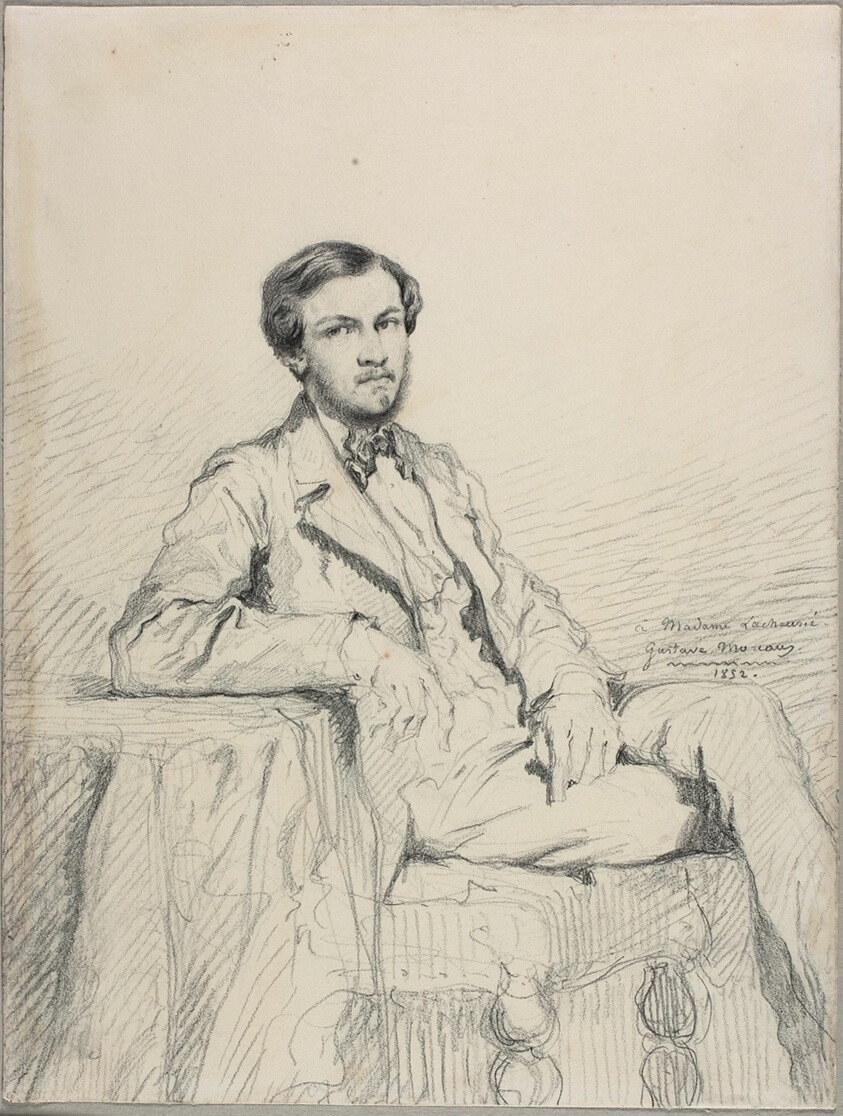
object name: Drawing and Watercolor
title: Portrait of Eugène Lacheurié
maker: Gustave Moreau (French, 1826-1898)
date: 1852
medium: Graphite on ivory wove paper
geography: France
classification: graphite; drawings (visual works); prints and drawing